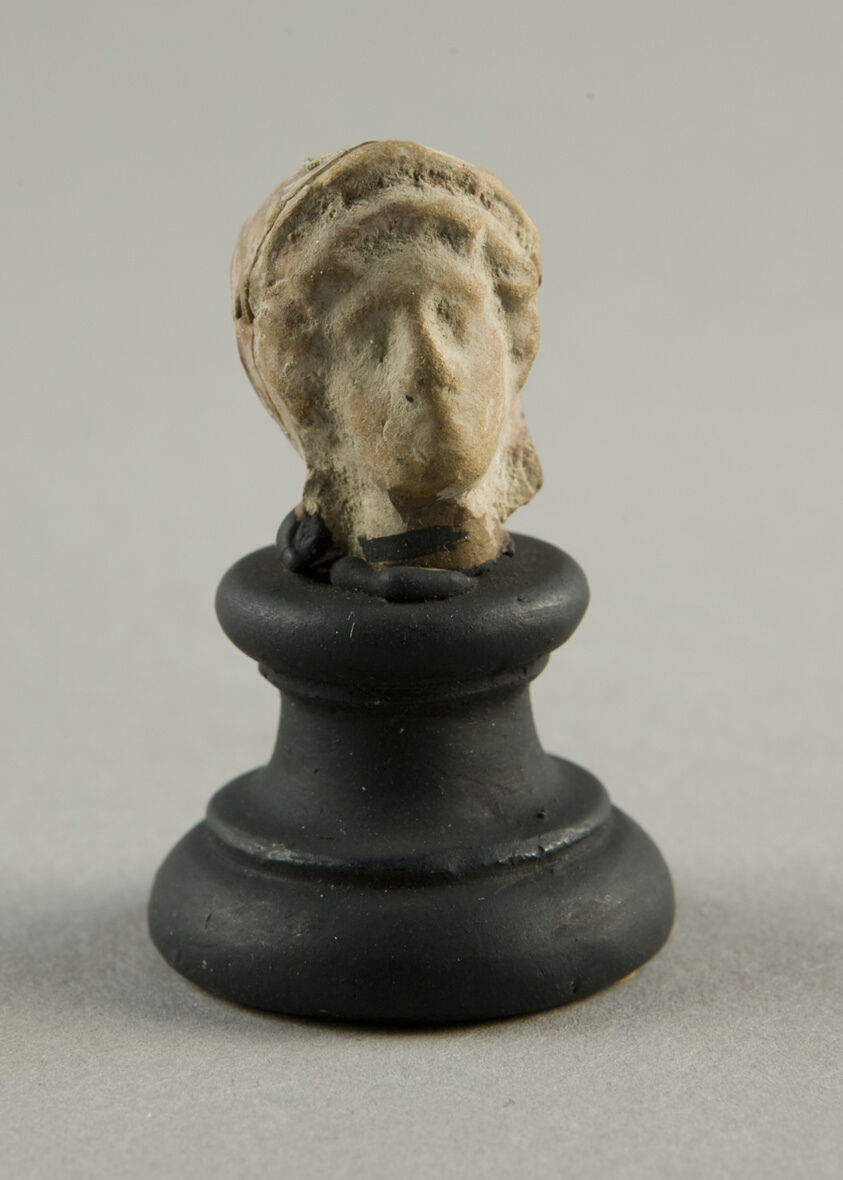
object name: Sculpture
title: Head of a Woman or Youth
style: greek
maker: Greek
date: 4th-3rd century BCE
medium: terracotta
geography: Greece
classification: earthenware; ceramics; sculpture; ancient art